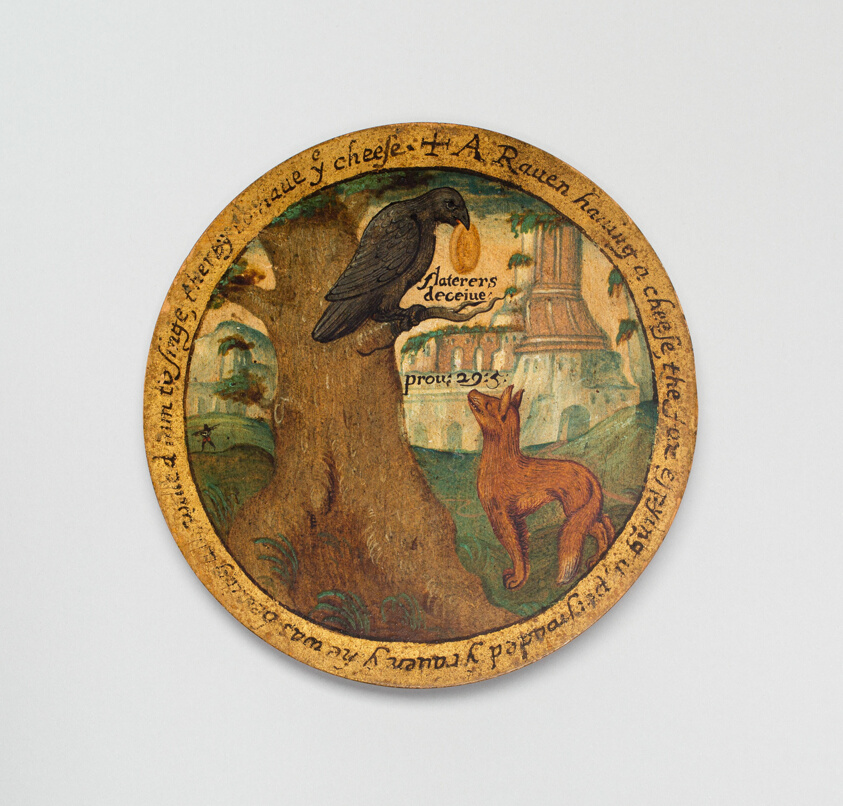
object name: Decorative Arts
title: Trencher with a Scene from Aesop's Fables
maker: England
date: c. 1600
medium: Sycamore, painted and gilded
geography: England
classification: wood; european decorative arts; decorative arts